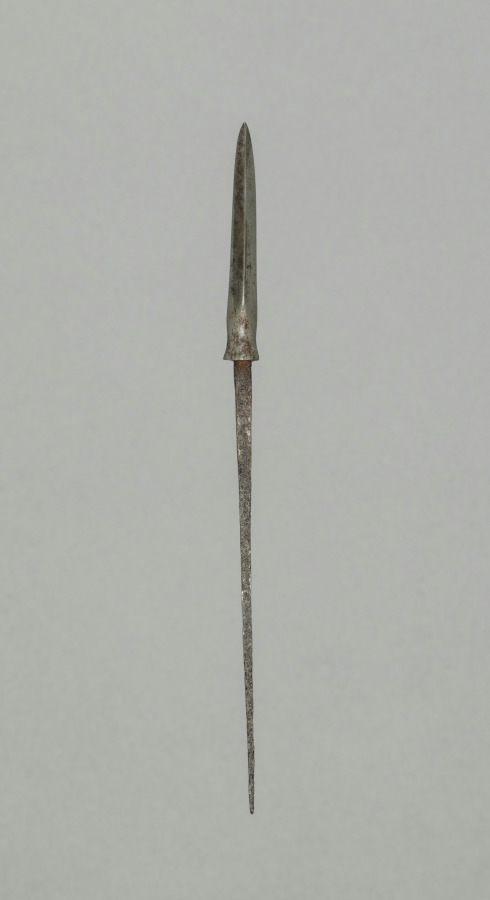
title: Arrow Point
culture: Japan, Edo period (1615–1868)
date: 1700s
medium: steel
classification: Arms and Armor